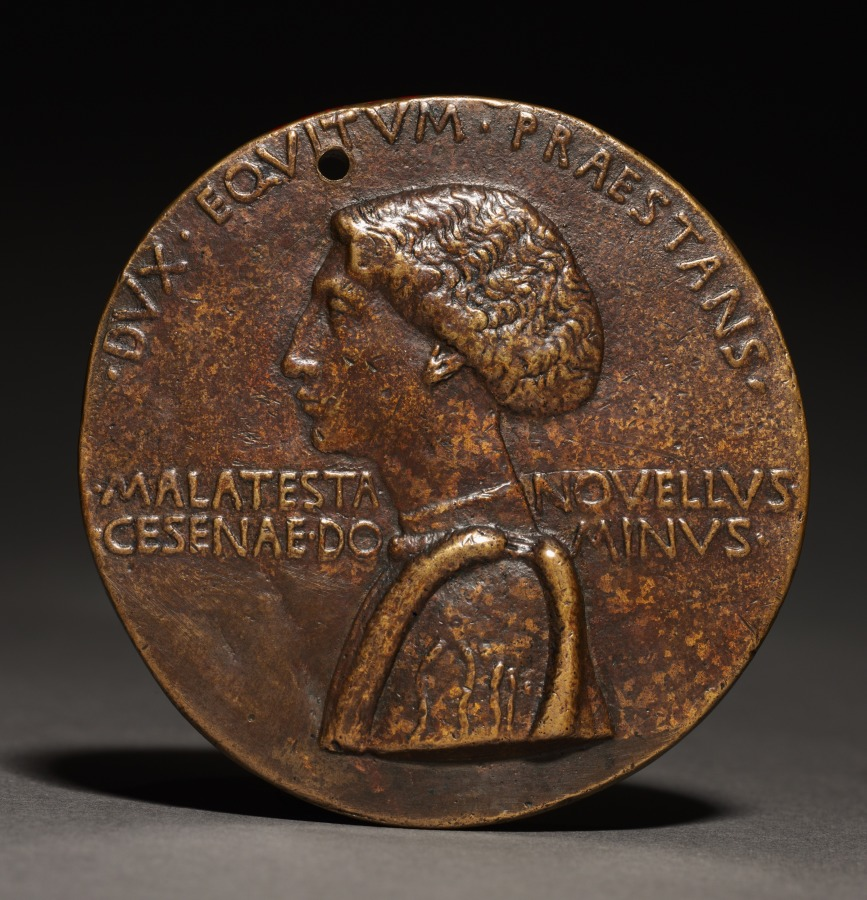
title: Portrait Medal of Domenico Novello Malatesta (obverse) Portrait Medal of Domenico Novello Malatesta (reverse)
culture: Italy, 15th century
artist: Pisanello (Italian, Ferrara, c. 1395–1455)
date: c. 1445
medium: bronze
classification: Sculpture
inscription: obverse: DVX EQVITVM PRAESTANS; across: MALATESTA NOVELLVS CESNAE DOMINVS.